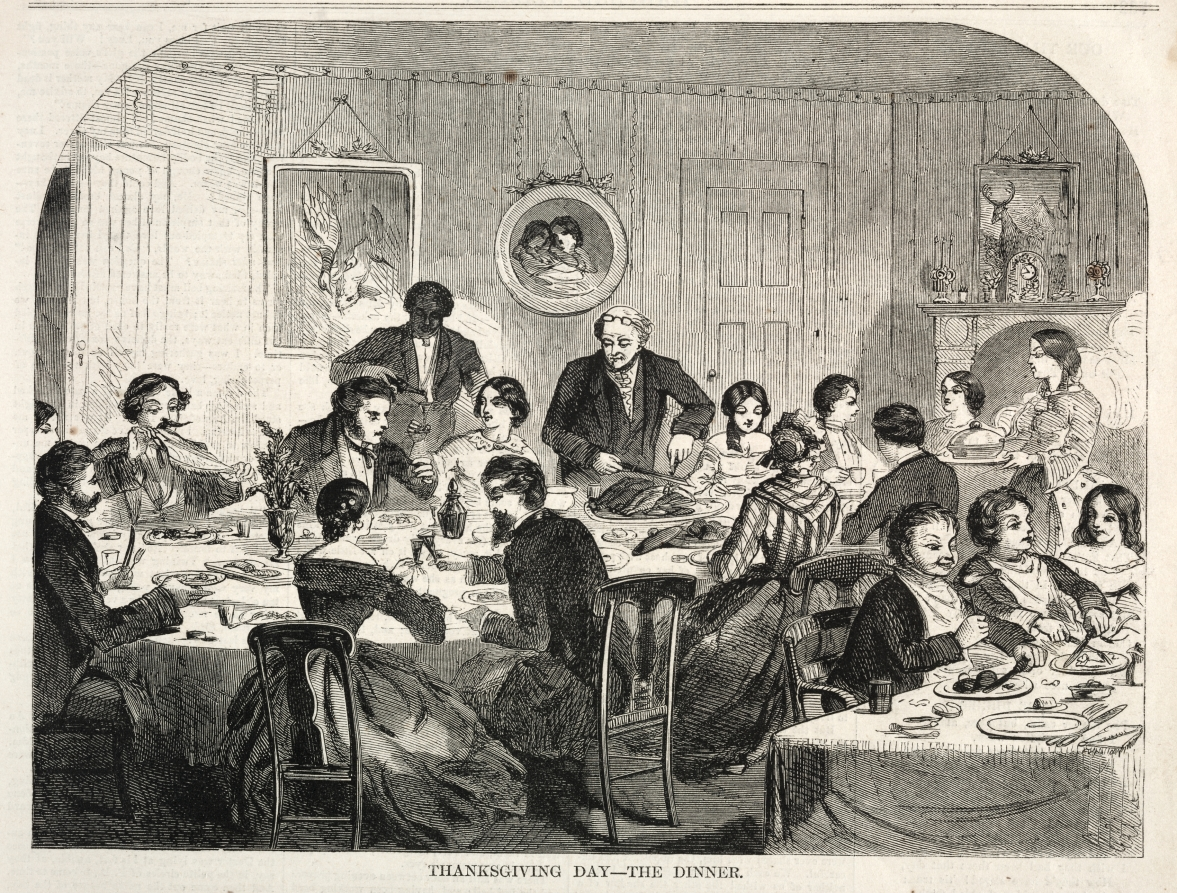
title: Thanksgiving Day - The Dinner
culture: America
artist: Winslow Homer (American, 1836–1910)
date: 1858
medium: wood engraving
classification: Print